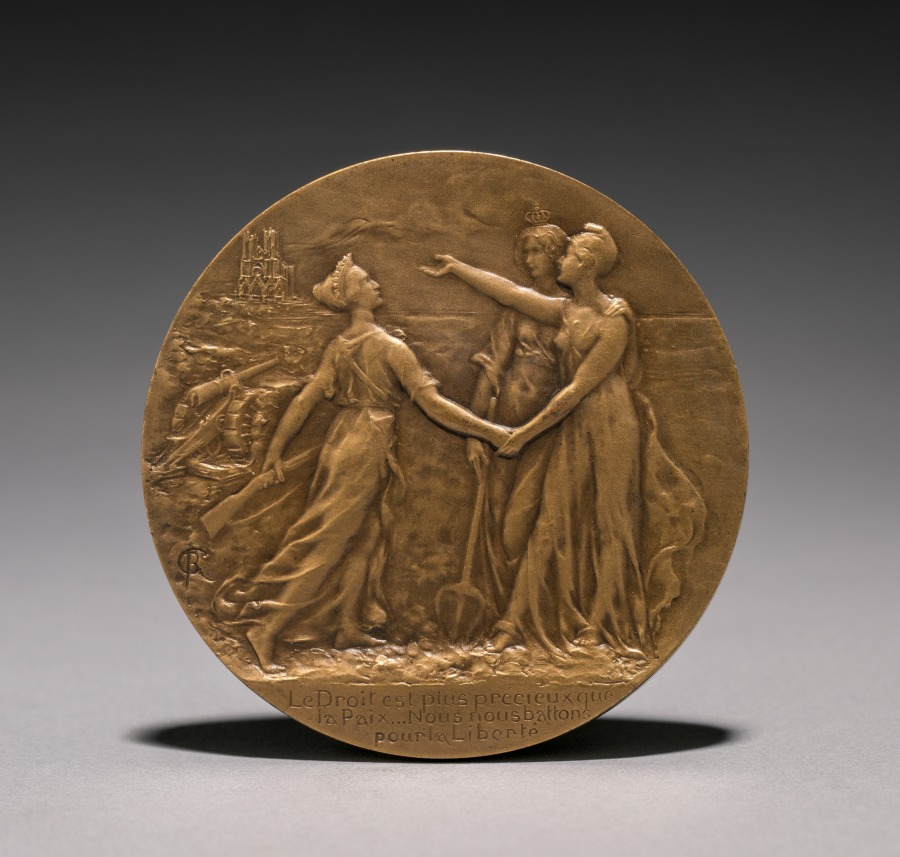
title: Medal (reverse)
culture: France, 20th century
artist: René Grégoire (French, 1871–1945)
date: 1914–1918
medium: bronze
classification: Metalwork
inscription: "Le droit est plus précieux que la paix . . . Nous, nous battons pour la liberté."